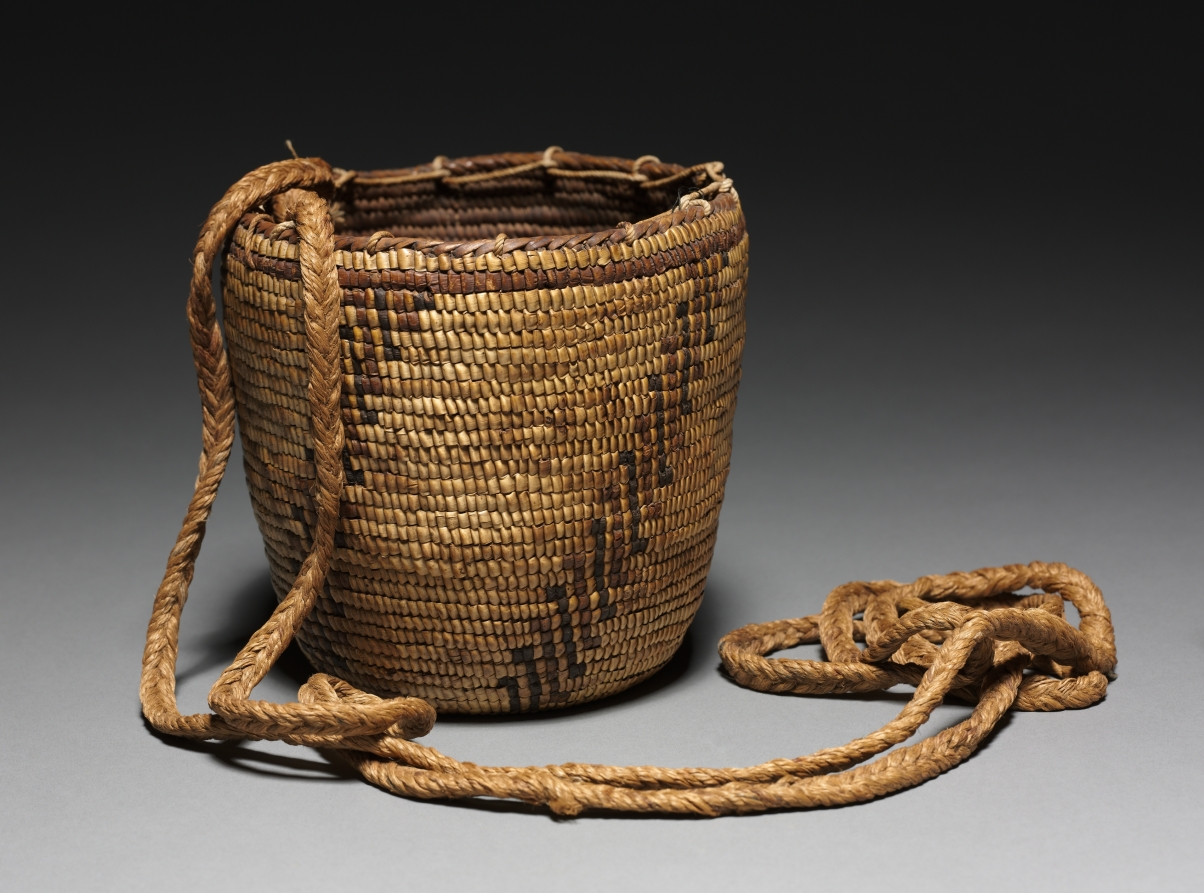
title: Berry Basket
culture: Northwest Coast, coastal, Salish, late 19th century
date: 1890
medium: woven, imbricated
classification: Basketry